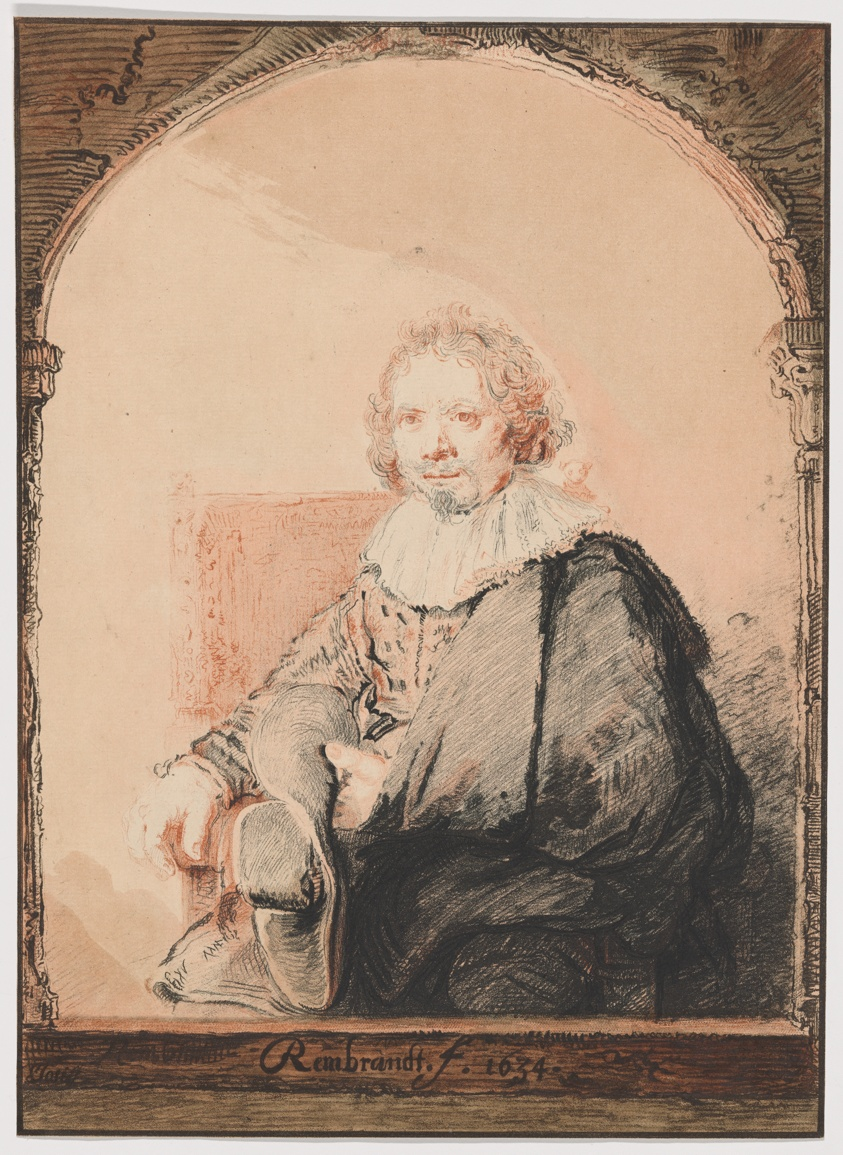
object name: Print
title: Portrait of a Man in an Armchair, from Collection d'imitations de Dessins d'après les Principaux Maîtres Hollandais et Flamands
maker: Christian Josi (Dutch, died 1828); after Rembrandt van Rijn (Dutch, 1606-1669)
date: 1826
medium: Soft ground etching from two plates, etching, aquatint, and roulette, with brush and grey wash, on paper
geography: Holland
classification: etching; print; prints and drawing